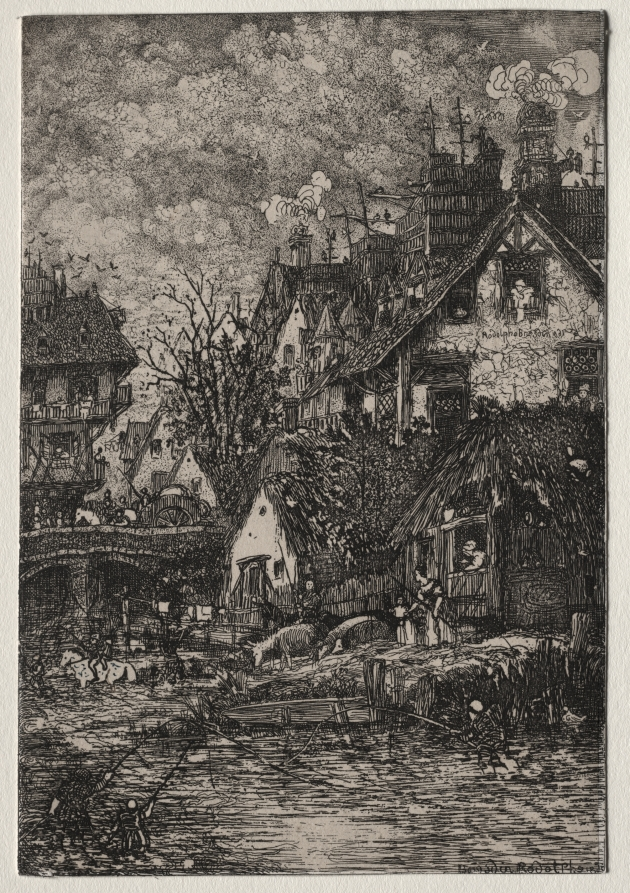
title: Entrance to a Village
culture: France, 19th century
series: Published in la Revue Fantaisiste, Vol. II, 15 mai 1861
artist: Rodolphe Bresdin (French, 1822–1885)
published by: Auguste Delâtre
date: 1861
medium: etching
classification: Print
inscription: lower right, in plate: Rodolphe Bresdin 1861 (the 'e's are reversed); center right: Rodolphe Bresdin 1861 (the '6' is reversed)